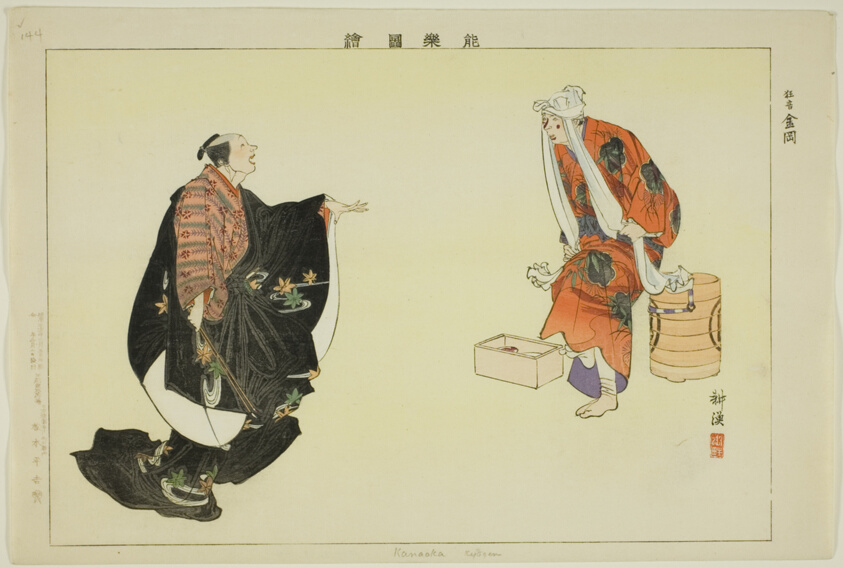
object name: Print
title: Kanaoka (Kyogen), from the series "Pictures of No Performances (Nogaku Zue)"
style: Japanese (culture or style)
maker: Tsukioka Kogyo; Japanese, 1869-1927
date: 1898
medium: Color woodblock print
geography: Japan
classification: woodblock print; print; asian art